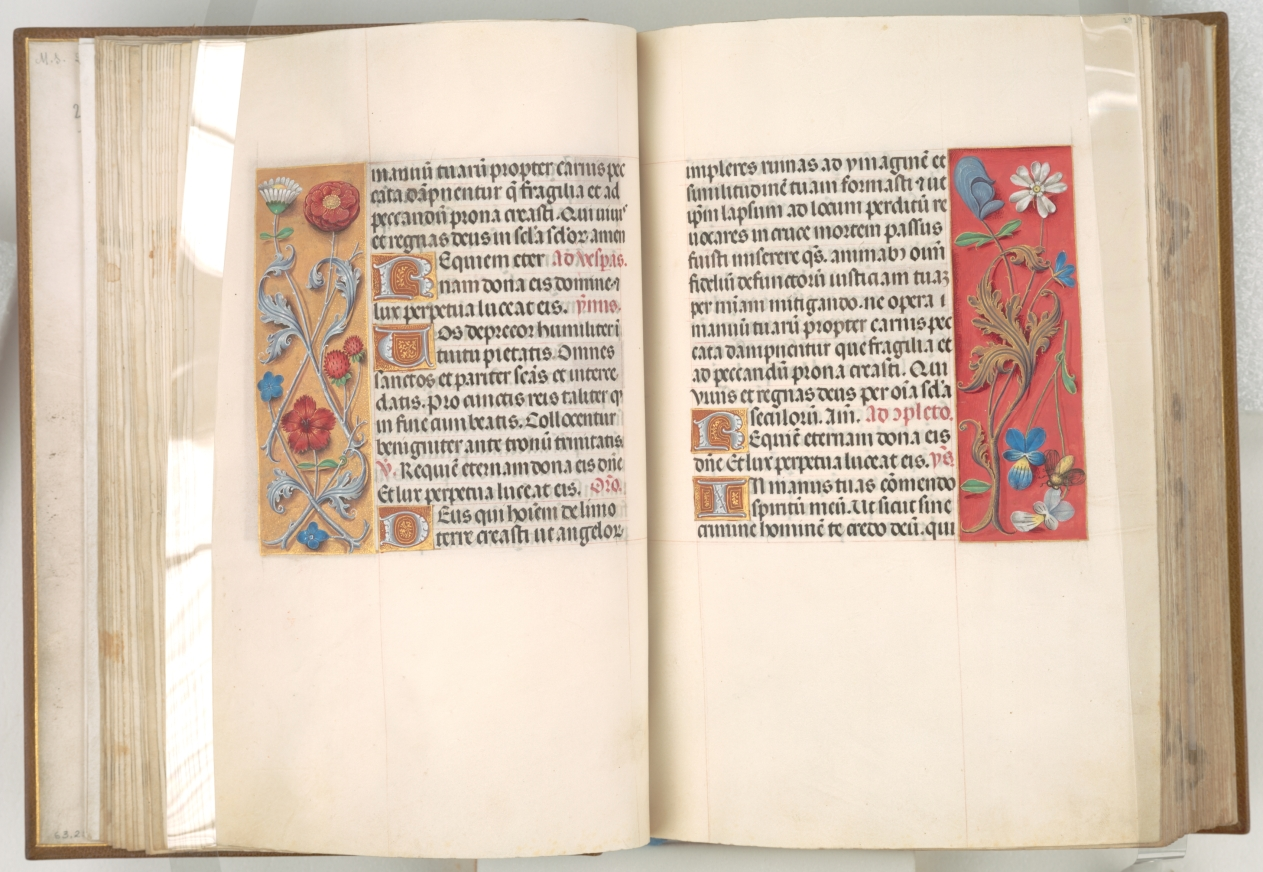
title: Hours of Queen Isabella the Catholic, Queen of Spain: Fol. 29r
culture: Flanders, Ghent and Bruges, late 15th century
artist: Master of the First Prayerbook of Maximillian (Flemish, c. 1444–1519)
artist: and Associates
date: c. 1500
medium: ink, tempera, and gold on vellum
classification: Bound Volume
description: A great lover of Flemish art, Queen Isabella treasured her many devotional books. This deluxe manuscript was created for her private devotions by highly organized and distinctly talented manuscript painters active in Ghent and Bruges. The Ghent-Bruges school represents the culmination of Flemish book painting, whose main features were the use of rich colors, illusionistic effects, a love of landscape, and a strong sense of visual narrative. Manuscripts produced by this circle of artists are renowned for their border decoration featuring a rich variety of realistically painted flowers, scrolling acanthus leaves, birds, and butterflies.